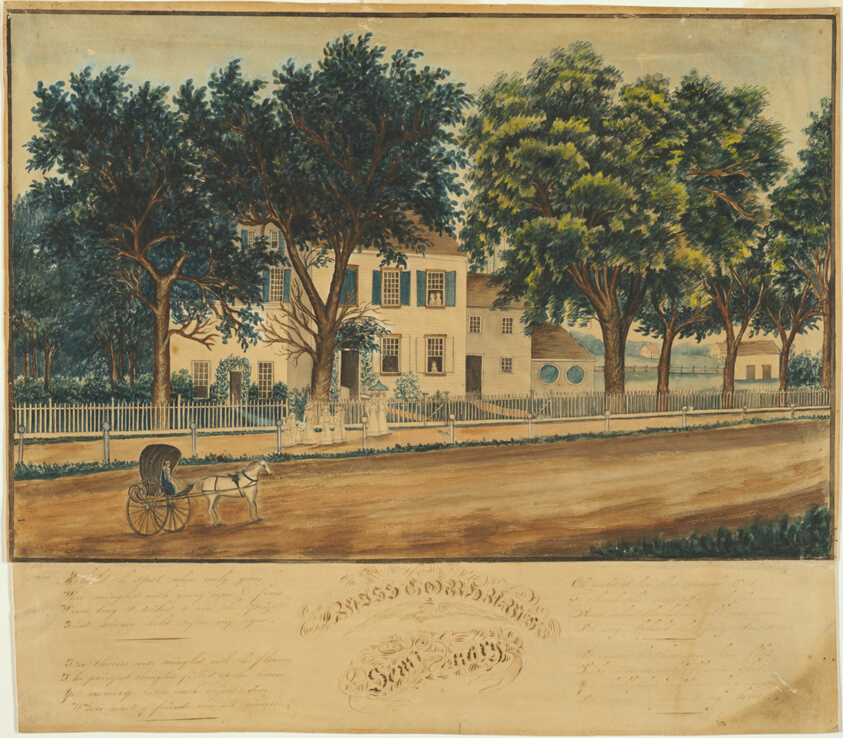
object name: Drawing and Watercolor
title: Miss Gorham's Seminary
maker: Unknown Artist; American, 19th century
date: 1820/29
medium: Watercolor on paper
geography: United States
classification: watercolor; drawings (visual works); prints and drawing